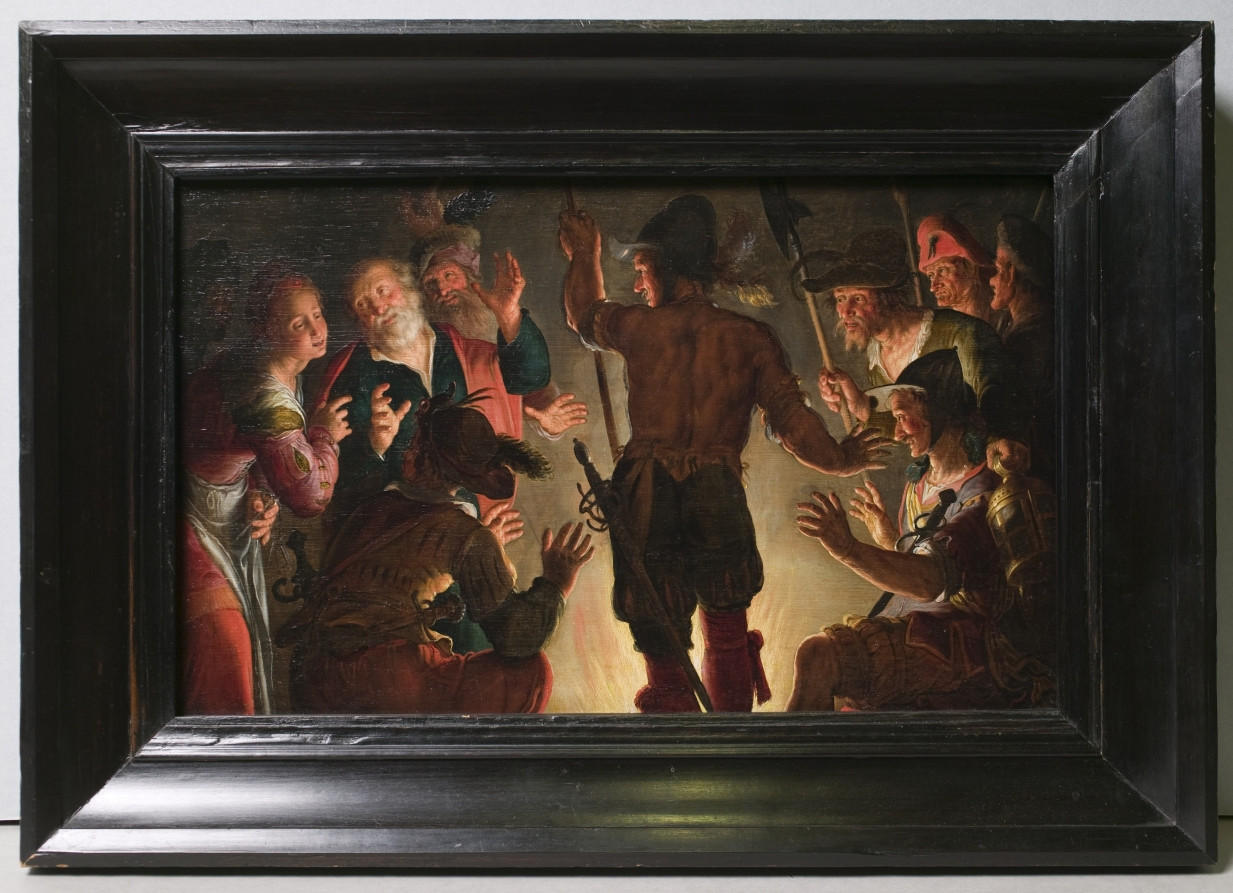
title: The Denial of Peter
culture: Netherlands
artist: Peter Wtewael (Dutch, 1596–1660)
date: c. 1624–28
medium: oil on wood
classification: Painting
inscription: Signed upper right: "Pet[...] / W[...]"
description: Wtewael depicted the moment after the Last Supper when the apostle Peter (at the left) denied knowing Jesus in order to protect himself from Roman soldiers searching for Christ's followers. Few works by this artist are known, and he draws on an unusual combination of styles. The dramatic use of light derives from Dutch followers of the Italian painter Caravaggio, in vogue around 1625, while the twisting bodies, startlingly low viewpoint, and tight detailing come from a more refined, courtly mode more popular earlier in the century.